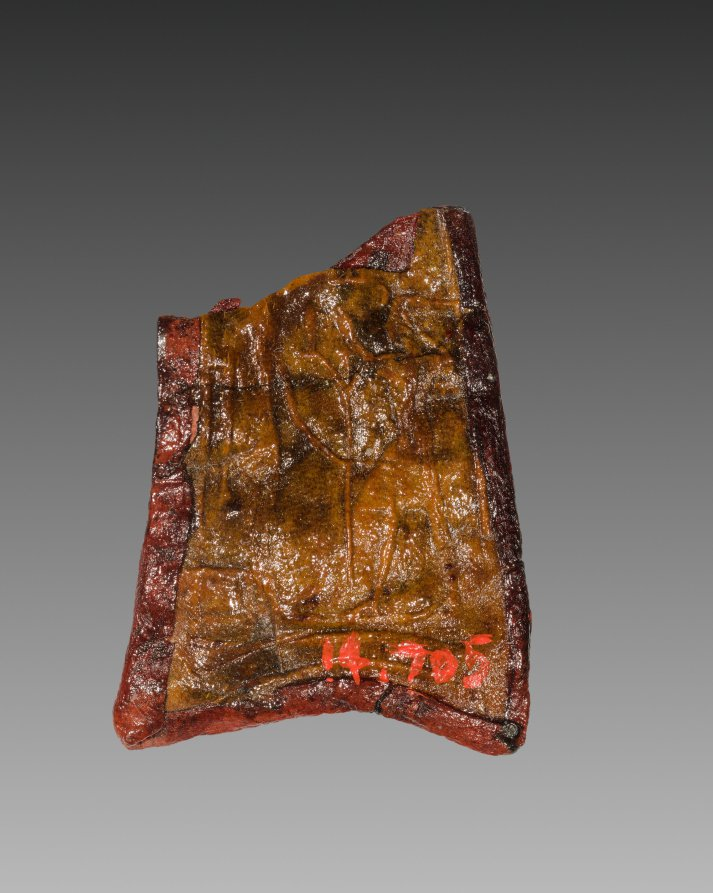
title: Tab from Mummy Band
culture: Egypt, Third Intermediate (1069–715 BCE), Dynasty 22, reign of Osorkon I (992–887 BCE)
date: 945–715 BCE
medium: stained leather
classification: Funerary Equipment